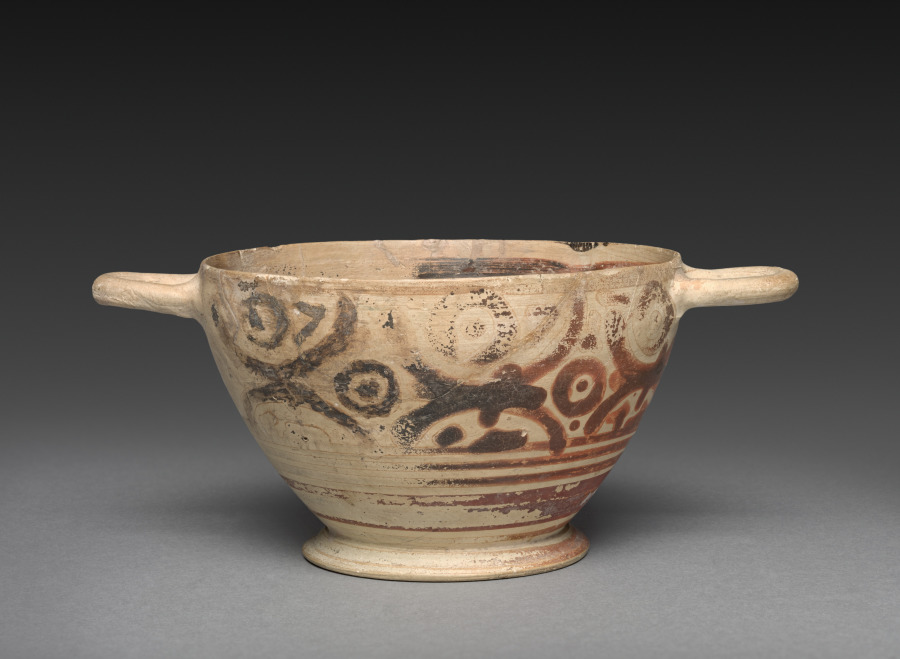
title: Black-Figure Kotyle (Drinking Cup)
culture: Greek, Corinthian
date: 500s BCE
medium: ceramic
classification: Ceramic